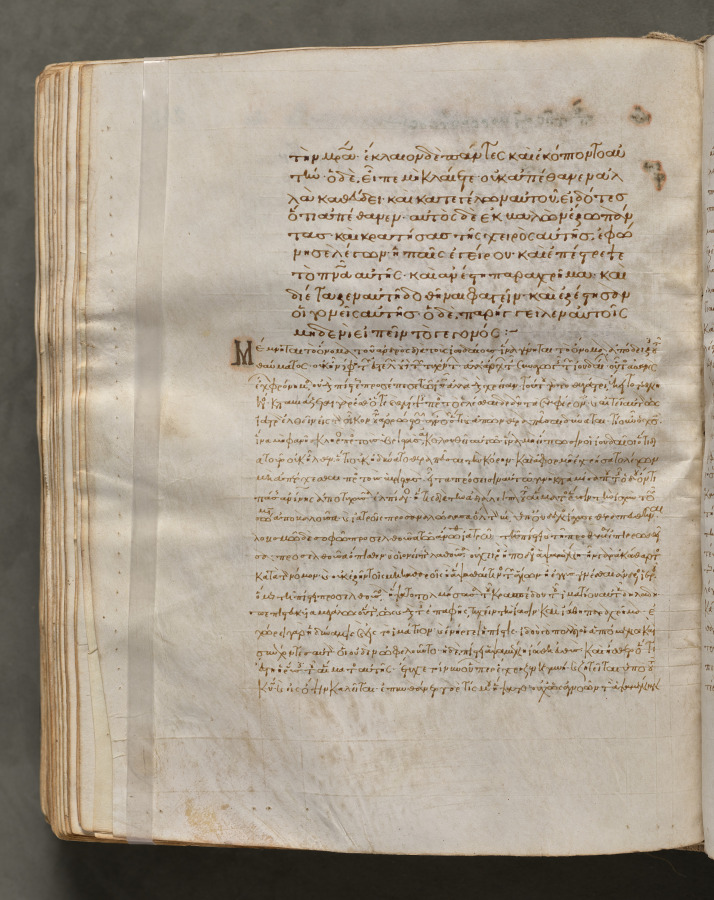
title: Text, folio 243 (verso), from a Gospel Book with Commentaries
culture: Byzantium, Constantinople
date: c. 1000–1100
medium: ink, tempera, and gold on vellum; leather binding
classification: Bound Volume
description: Each of the four gospels in this book opens on a page with brilliantly illuminated borders depicting the author of the text as well as birds—principally peacocks, symbols of the immortality of the soul—and fountains, representing the fountain of life and the salvation of the soul. This volume consists of 428 leaves with texts in Greek. Its level of sophistication suggests that it was probably written and decorated in a monastery in Constantinople.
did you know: Gospel books were carried in procession through Byzantine churches.